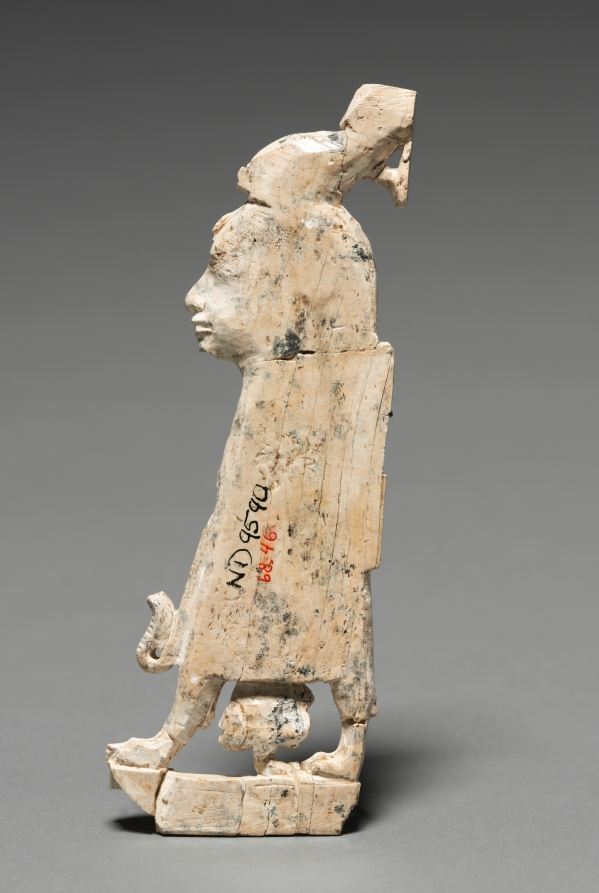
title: Decorative Plaque: Winged Sphinx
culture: Phoenicia, Iraq, Nimrud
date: 900–800 BCE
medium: ivory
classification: Ivory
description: This small plaque was executed in the Phoenician style with symmetrical compositions, elongated figural proportions, and Egyptian subjects and motifs. Examples have been found throughout the Middle East, but thousands come from Nimrud where most were excavated in the storerooms of a military arsenal built by King Shalmaneser II (858-824 bc). When the Nimrud palace was sacked in the 7th century bc, these ivories were thrown into a well, where Sir Max Mallowan (the husband of Agatha Christie) discovered them in 1951. The monumental wall relief (1943.246) was found at the same Assyrian palace at Nimrud.